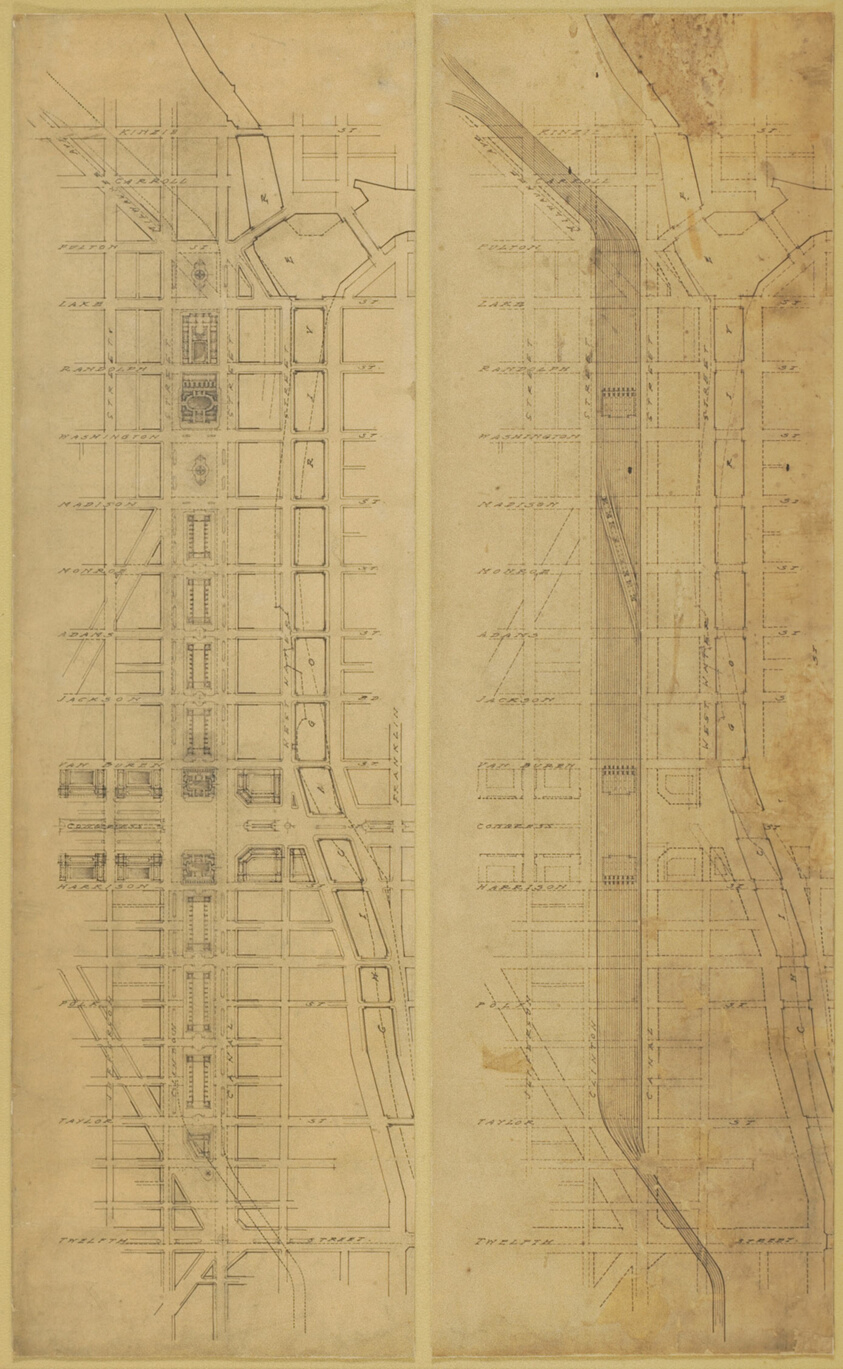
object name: Architectural Drawing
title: Plate 78 (2 Drawings) from The Plan of Chicago, 1909: Suggested Location and Arrangement of the Railway Passenger Stations West of the River. Subway Scheme: 1. Plan of Street Level. 2. Plan Below Street Level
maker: Daniel Hudson Burnham, American, 1846-1912; Edward Herbert Bennett, American, born England, 1874-1954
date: 1909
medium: Ink on tracing paper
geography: Chicago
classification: ink; architectural drawing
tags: Chicago, architecture